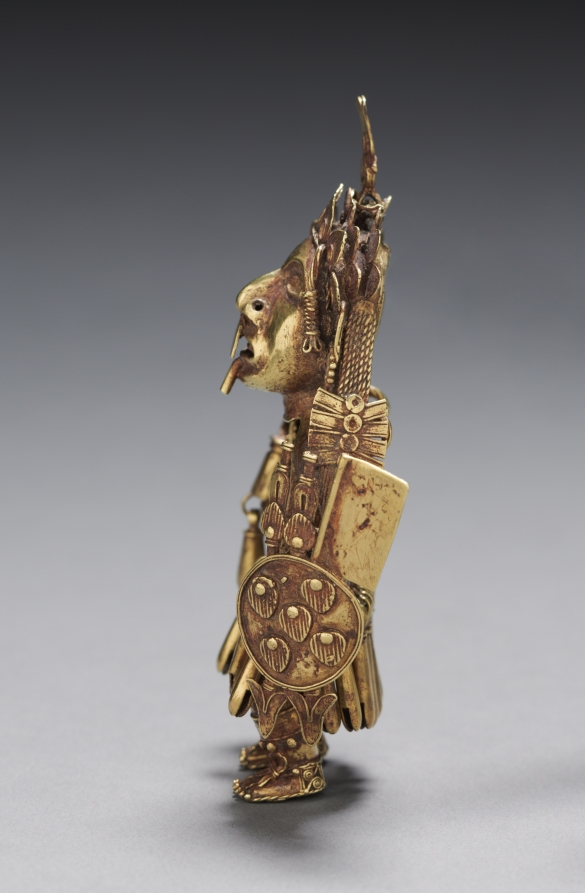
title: Figure of a Warrior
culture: Central Mexico, Tetzcoco?, Aztec, Post-Classic Period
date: after 1325 (thermoluminescence date of casting core, 1345–1575)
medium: gold-silver-copper alloy (cast)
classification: Metalwork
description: The elite status of this warrior, who holds a dartthrower, darts, and a shield, is revealed by the gold from which he is made as well as his jewelry and sandals. Military accomplishment was prized by the Aztecs, whose imperial expansion was fueled by ambition as well as their belief that they were chosen to uphold cosmic order through war. The purpose of the chest cavity is unclear; the figurine may have been worn as a pendant.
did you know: The calendar glyphs on the figure's back read "2 Rabbit, 3 Water."